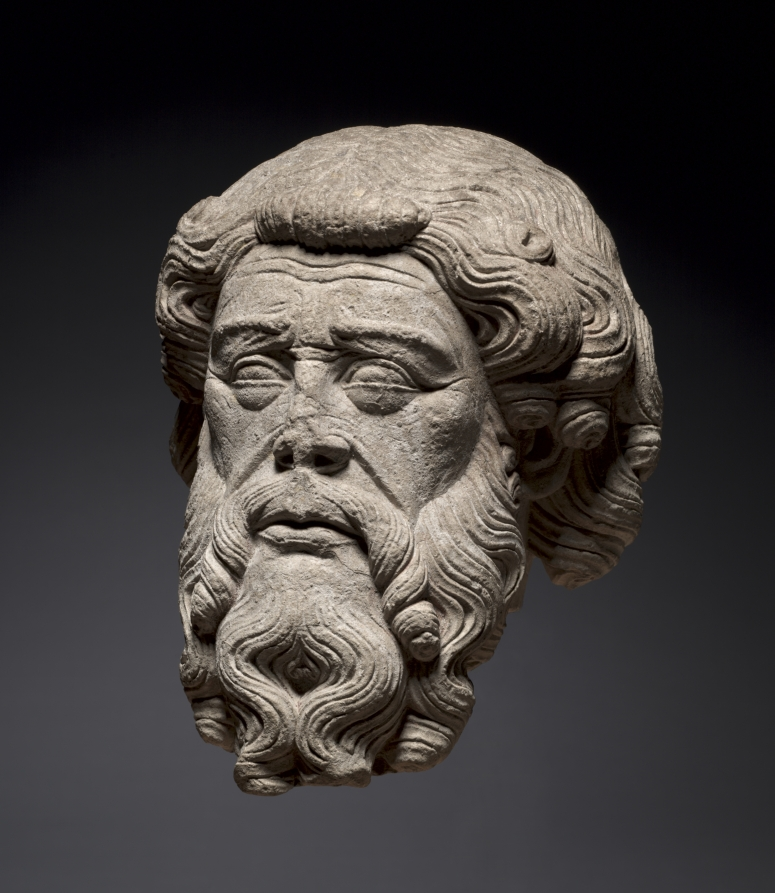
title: Head of an Apostle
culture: Southwestern France, Toulouse?, 14th century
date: c. 1325–1350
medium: limestone, with traces of polychromy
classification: Sculpture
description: This detached head with deeply incised hair was likely that of a large, nearly life-sized figure of an apostle. It would have originally stood more than 6 feet in height and was gilded and painted. The head was formerly affixed to a halo carved from the same block of stone, and the head would have been slightly angled downward. Though its original context is unknown, the style is generally suggestive of sculptural programs in Toulouse during the early 1300s.